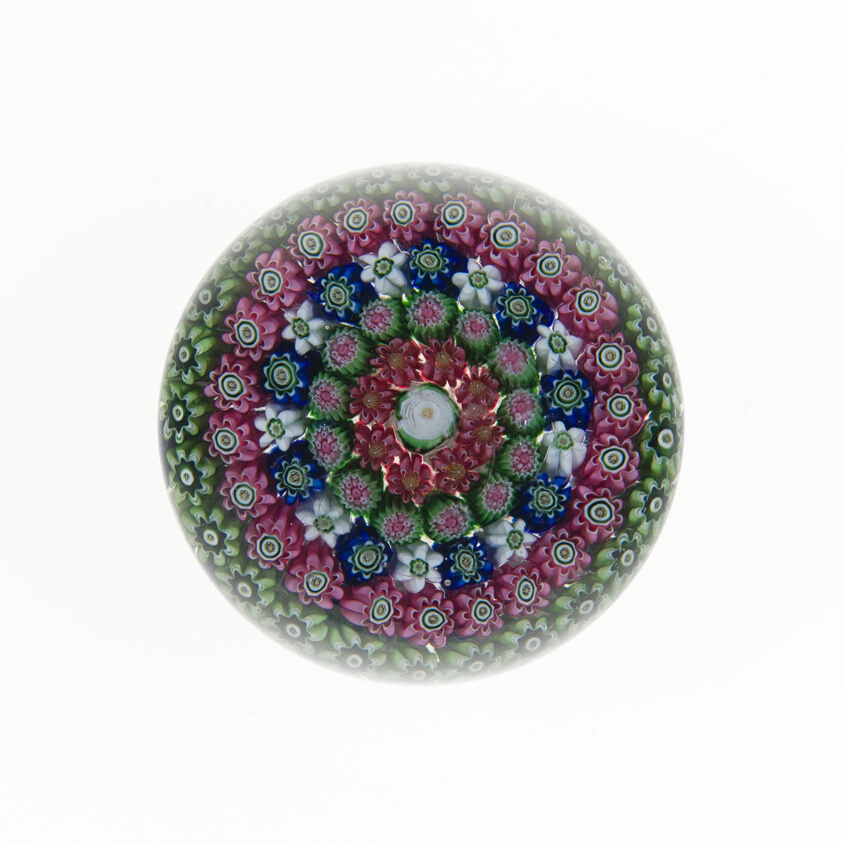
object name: Glass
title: Paperweight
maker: Clichy Glassworks (Cristalleries de Clichy); Clichy, France, 1837-1885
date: 19th century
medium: Glass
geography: Clichy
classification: paperweight; millefiori; european decorative arts; glass